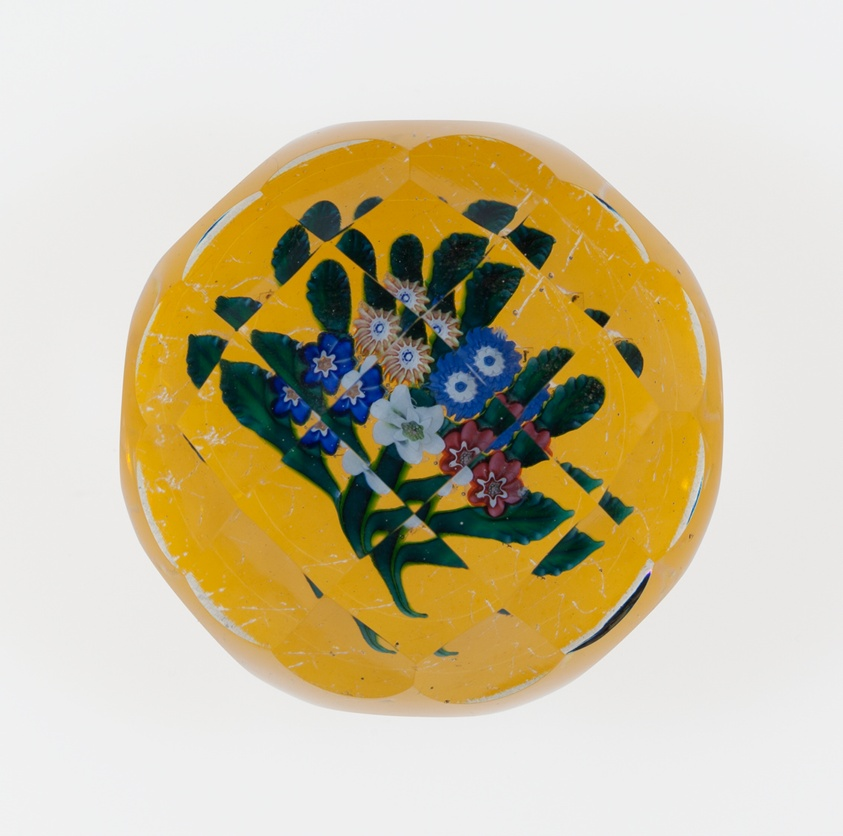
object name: Glass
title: Paperweight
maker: Saint-Louis Glassworks (Cristalleries de Saint-Louis); Lorraine, France, founded 1586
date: c. 1845–60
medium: Glass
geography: Saint-Louis-lès-Bitche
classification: paperweight; glass